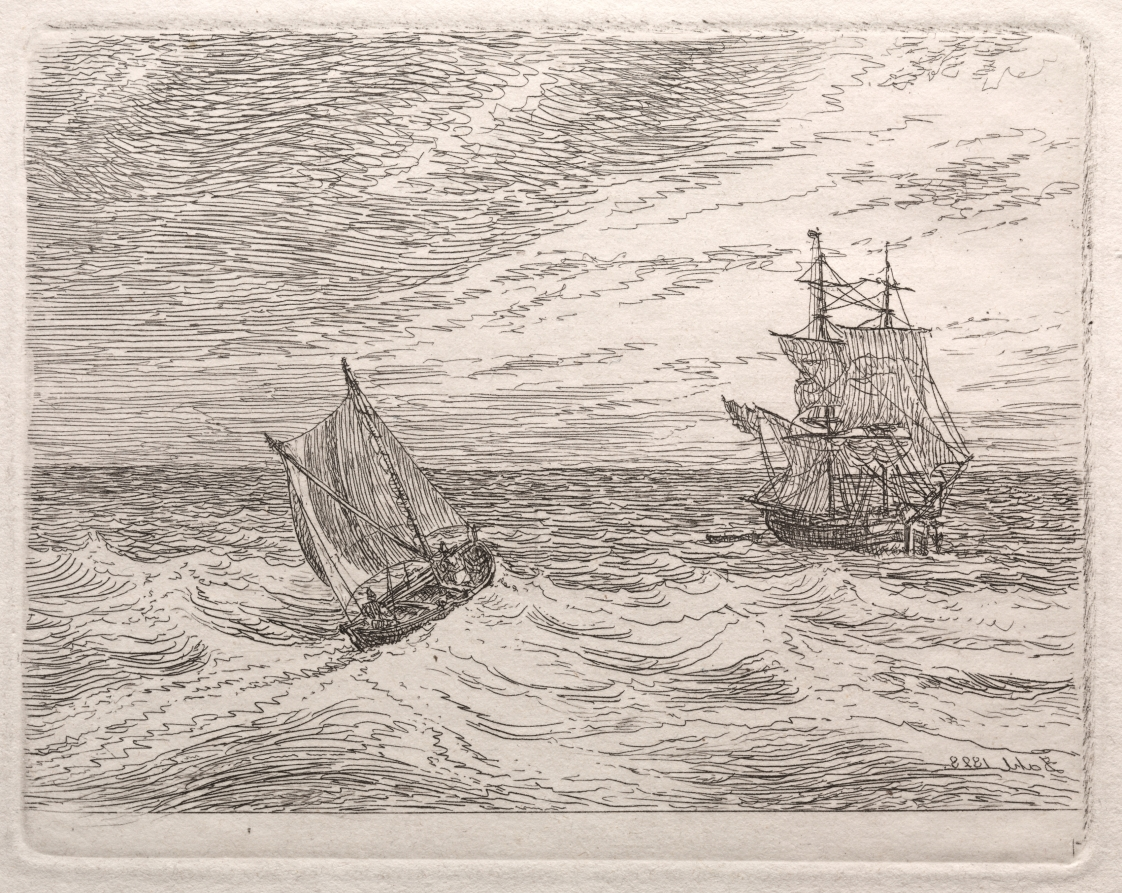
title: Rough Seas with a Two-master and Sailboat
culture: Norway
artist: Johann Christian Clausen Dahl (Norwegian, 1788–1857)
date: 1838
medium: etching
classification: Print